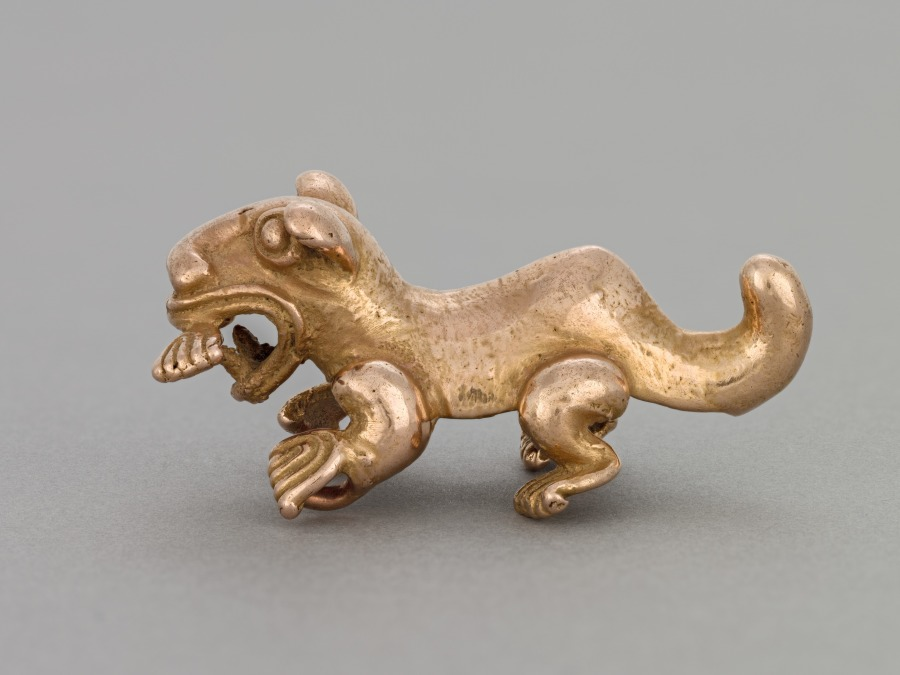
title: Feline Pendant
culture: Isthmian Region, Panama-Costa Rica, Veraguas-Chiriquí style, 11th century-16th century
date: 1000–1550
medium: gold, cast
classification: Metalwork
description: This memorable jaguar pendant is a nasty precious—nasty because it holds a severed limb (probably human) in its fanged mouth but precious due to its material, its well-polished silky surface, and the charming rendering, which reduces the jaguar to cartoon-like essentials. The warm, rosy color is the result of copper in the alloy.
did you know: In the Panama-Costa Rica region gold ornaments were associated with political and religious authority.